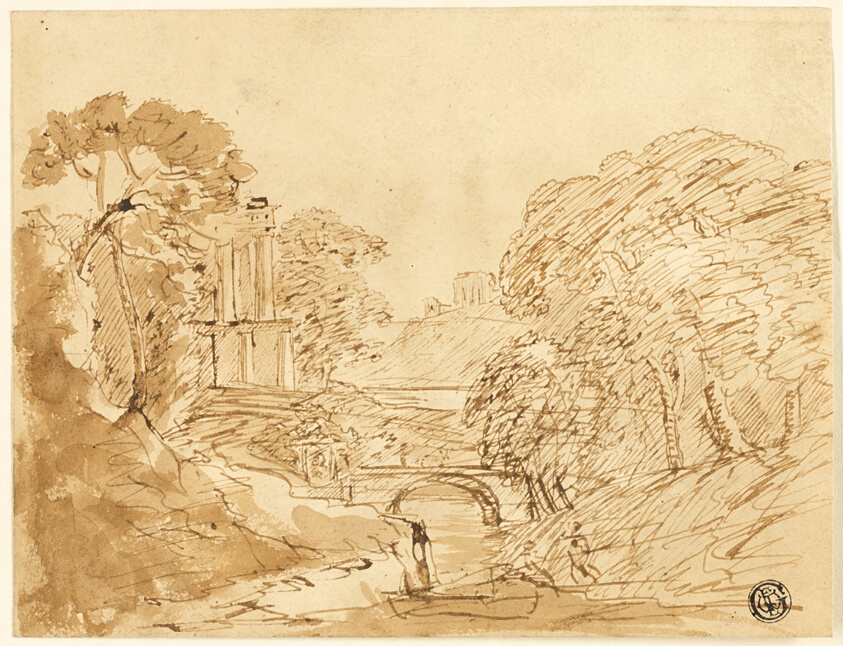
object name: Drawing and Watercolor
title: Landscape with Bridge and Ruins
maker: Franz Kobell (German, 1749-1822)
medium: Pen and brown ink, with brush and brown wash, on tan wove paper, tipped onto cream wove paper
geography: Germany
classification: pen and ink drawings; drawings (visual works); prints and drawing